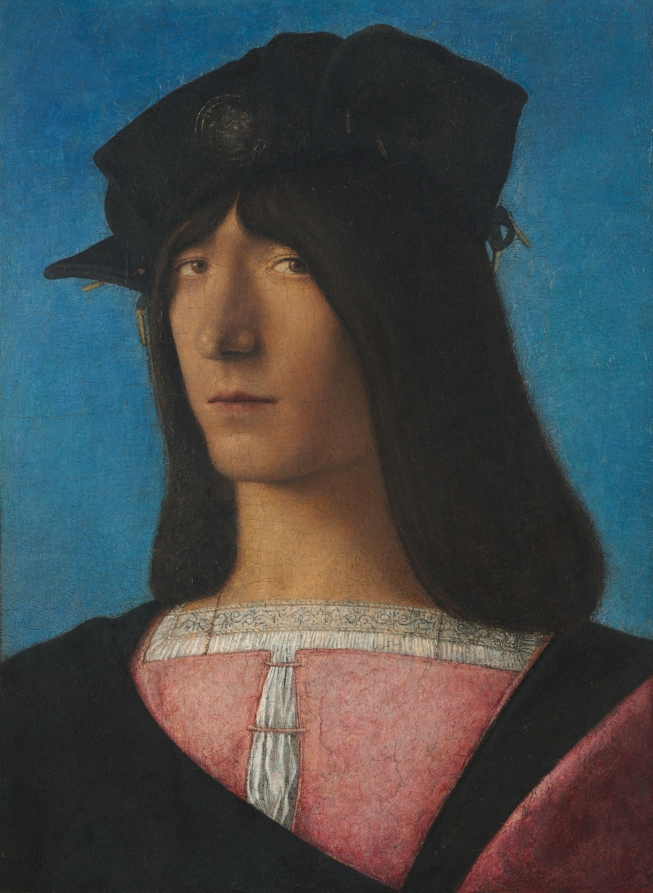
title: Portrait of a Man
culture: Italy, 16th century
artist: Bartolomeo Veneto (Italian, 1531)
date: c. 1510s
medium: oil on wood, transferred to wood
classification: Painting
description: This young man is possibly a member of the Sforza household, the ruling family of Milan during the Renaissance. He wears a plaquette on his hat indicating his nobility and status. This medallion depicts an actual work by Andrea Riccio (1470–1532), an artist whose work is represented in the museum's collection. The medallion illustrates an allegory of fortune and virtue personified by a winged woman and a child.